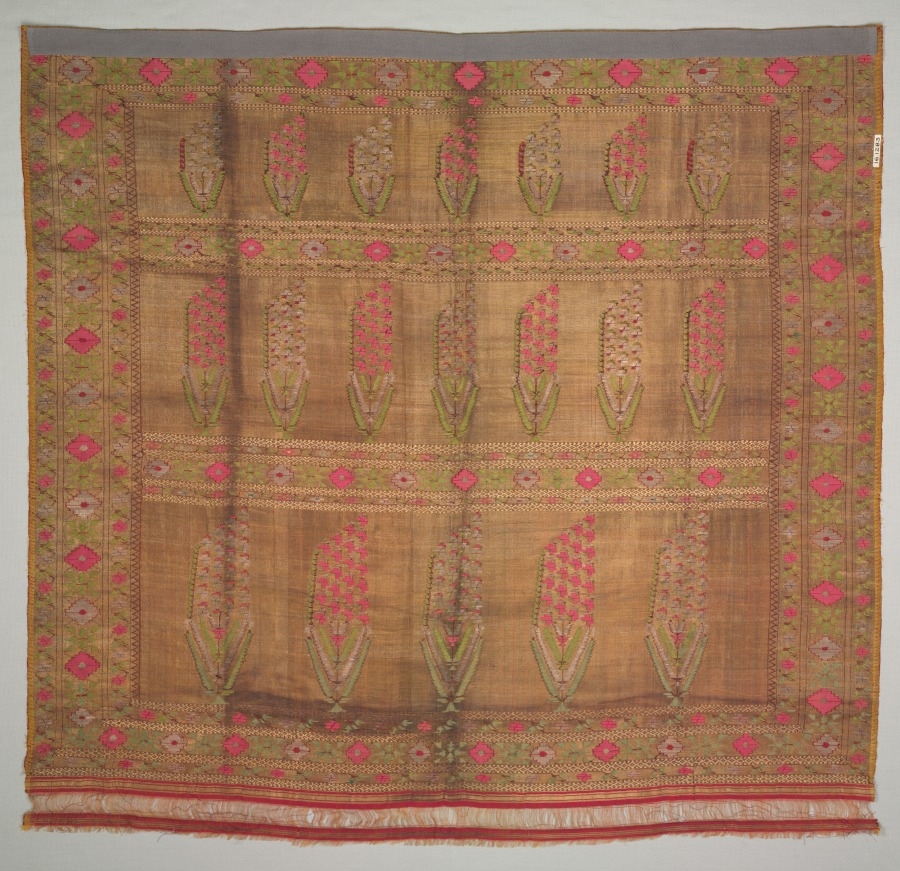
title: Fragment of a Sari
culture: India, Aurangabad ?, 18th-19th century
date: 1700s - 1800s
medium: brocade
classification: Textile